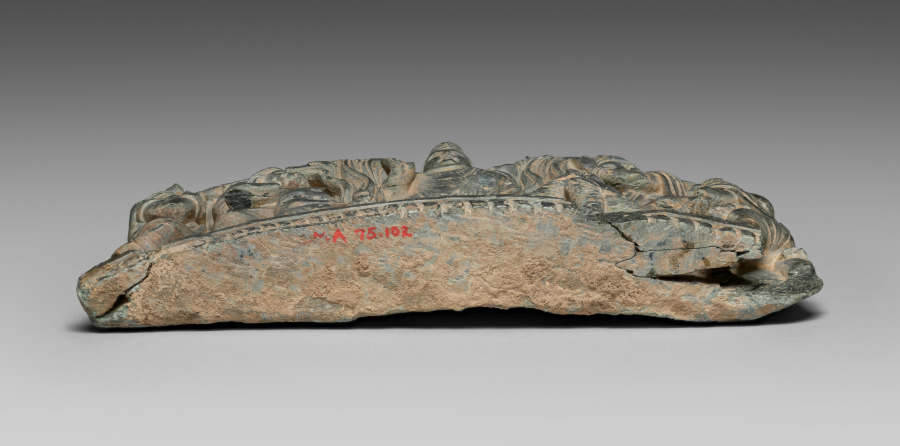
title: The Great Miracle at Shravasti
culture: Pakistan, Gandhara, Peshawar Valley, early Kushan period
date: c. 100 CE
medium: schist with traces of gold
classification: Sculpture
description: After the Buddha reached enlightenment, he spent the remainder of his life traveling around northeastern India, giving teachings and performing miracles in order to convert followers and establish the Buddhist community. One of his most famous miracles is when he levitated and caused fire to leap from his shoulders and water to flow from his feet. The figures of two monks kneel in worship. Others press their hands together in a sign of devotion and submission, while the figures on the outer edges whistle and shake their upper garments, as was customary when an amazing sight was seen.